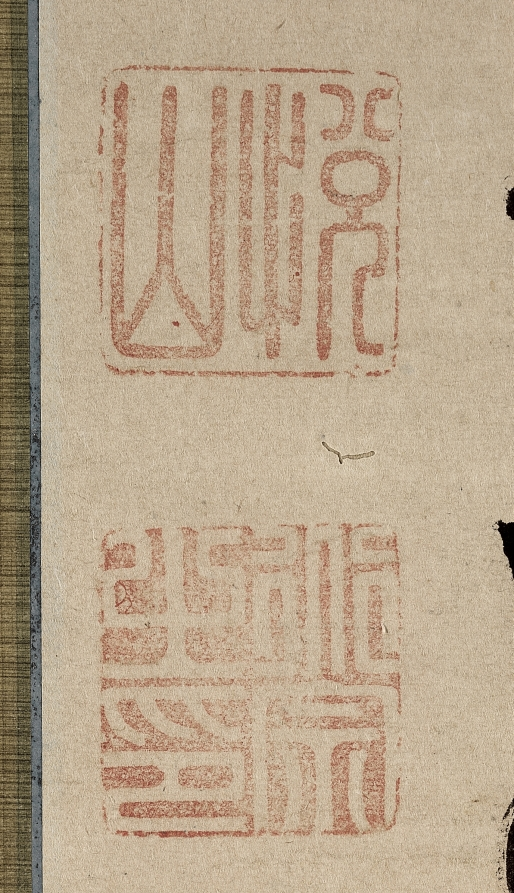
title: Calligraphy in Semi-Cursive Style (xing-caoshu)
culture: China, Qing dynasty (1644–1911)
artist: Yueshan Daozong (Chinese, 1629–1709)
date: c. 1660–1709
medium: Hanging scroll; ink on paper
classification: Calligraphy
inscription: 初/ 龍吟初夜後，虎嘯五更前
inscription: 悅山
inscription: 道宗之印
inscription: Linji zheng zong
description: This spontaneous, bold calligraphy style is characteristic of members of the Japanese Ōbaku school (Huangbo in Chinese) of Chan (Zen in Japanese) Buddhism, which was founded in Japan by Chinese monks in the 1600s. The monk Yueshan emigrated to Japan from the Chinese province of Fujian, taking a priestly post at Manpukuji, the headquarters of the Ōbaku school in Japan. He later became the seventh abbot of the distinguished temple. Yueshan’s calligraphy features rounded characters that allow him to fuse strokes and characters in speedy brush movements. Here the text begins with the large character chu (初, “the beginning”), the initial focus of meditation on the text: The dragon murmurs after sunset. The tiger roars before dawn.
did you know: Ōbaku-style calligraphy favors rounded—rather than angular—brushstrokes. It is not a subtle style of calligraphy, as the Chan monks preferred a bold approach.